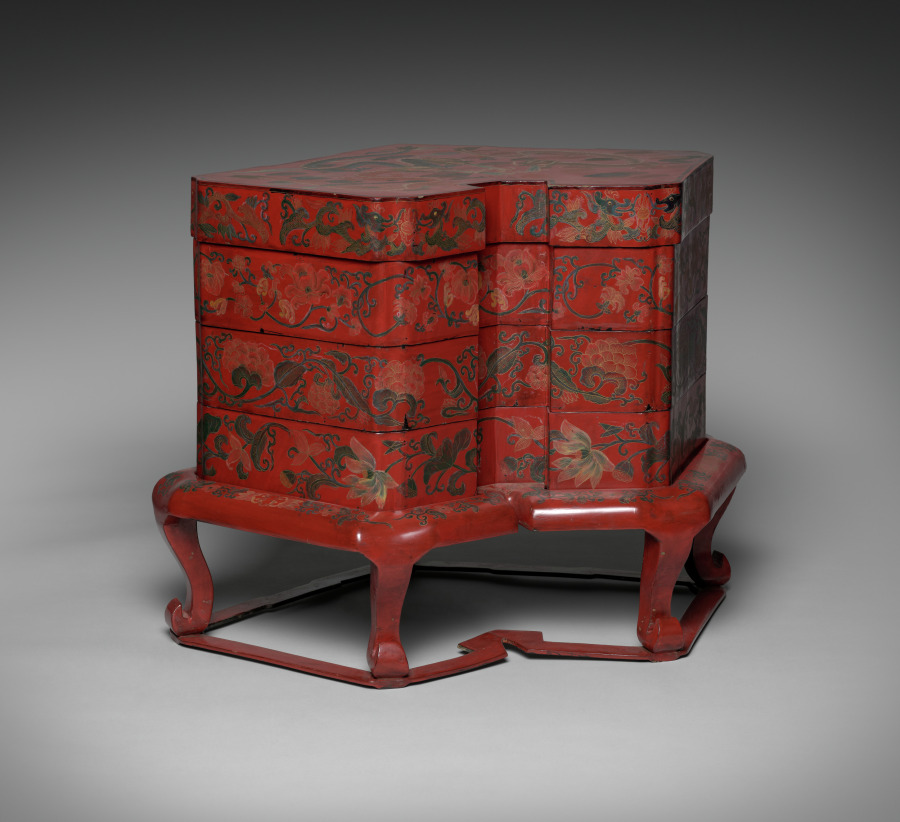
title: Tiered Food Box with Stand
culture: Japan, Edo period (1615–1868)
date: late 1700s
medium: red lacquer over a wood core, with litharge painting and engraved gold designs (Ryukyuan)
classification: Lacquer